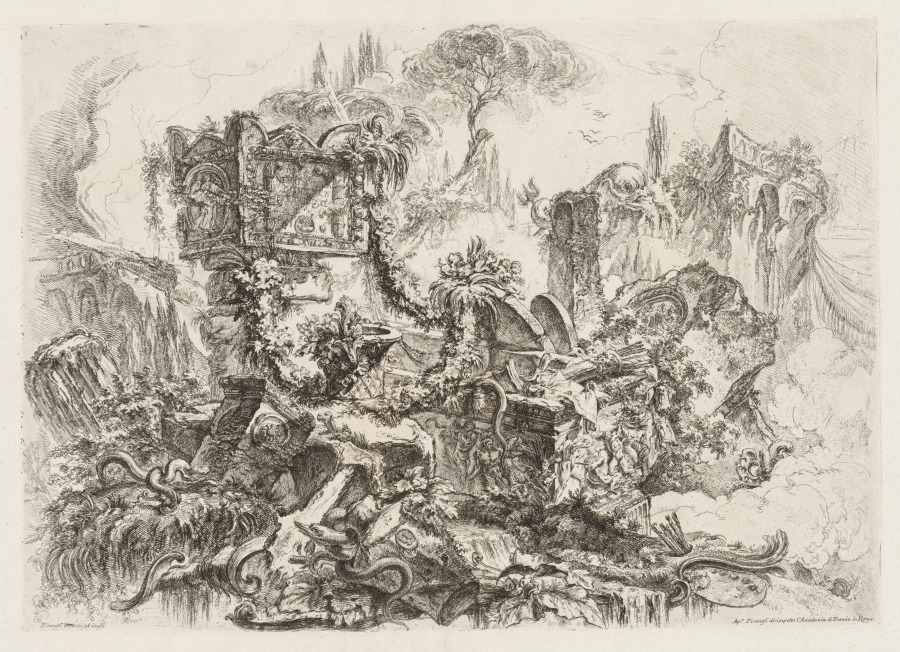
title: The Tomb of Nero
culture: Italy, 18th century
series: Grotteschi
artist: Giovanni Battista Piranesi (Italian, 1720–1778)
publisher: Giovanni Bouchard (Italian, 1700-1850)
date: 1747–48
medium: etching with engraving and drypoint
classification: Print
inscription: Lower left, in plate: Piranesi invento; et incise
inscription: lower right, in plate: Apo. Piranesi dir impetto l'Accademia di Francia in Roma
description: An ancient tomb, teeming with slithering snakes and overgrown vegetation, conjures the ruins of a strange and distant past in this print. The more lightly etched background appears faint against the jumble of darker lines in the foreground, as if the whole scene is slowly fading into the mist of time. Although the composition might seem to be one of pure imagination, the tomb it depicts was based on a real monument the artist had observed near Rome. Fascinated by classical antiquity, Giovanni Battista Piranesi evoked his own experience of seeing ruins, which he felt could not be conveyed by a more realistic portrayal.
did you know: Popularly associated with the Emperor Nero in the 1700s, the monument the artist depicted has since been identified as the tomb of P. Vibius Maranus.